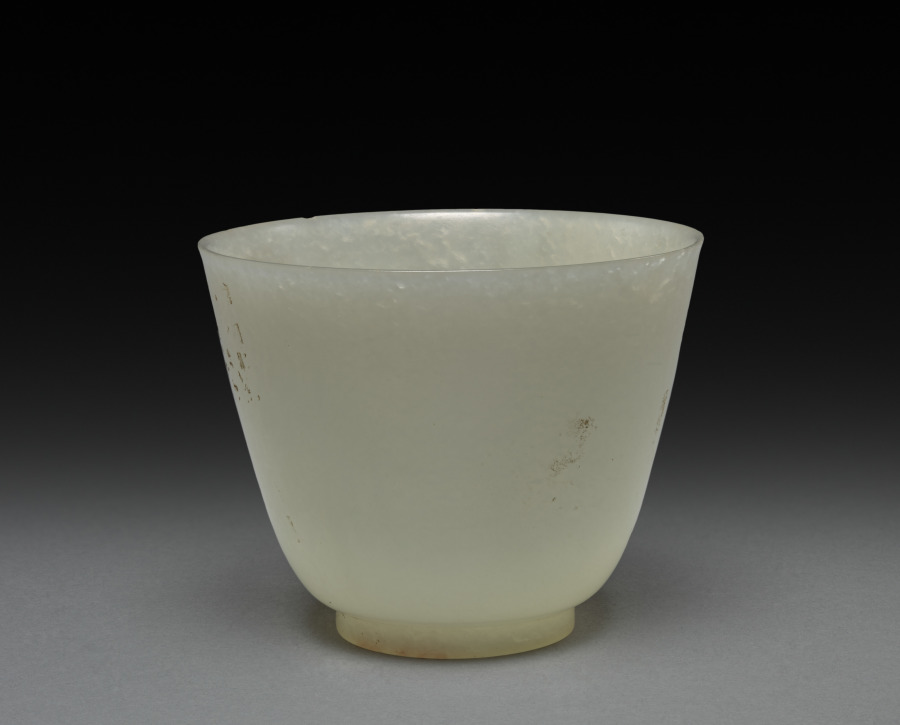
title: Lotus-shaped Dish and Cup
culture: China, Qing dynasty (1644–1911), Qianlong reign (1736–95)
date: 1736–95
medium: jade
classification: Jade